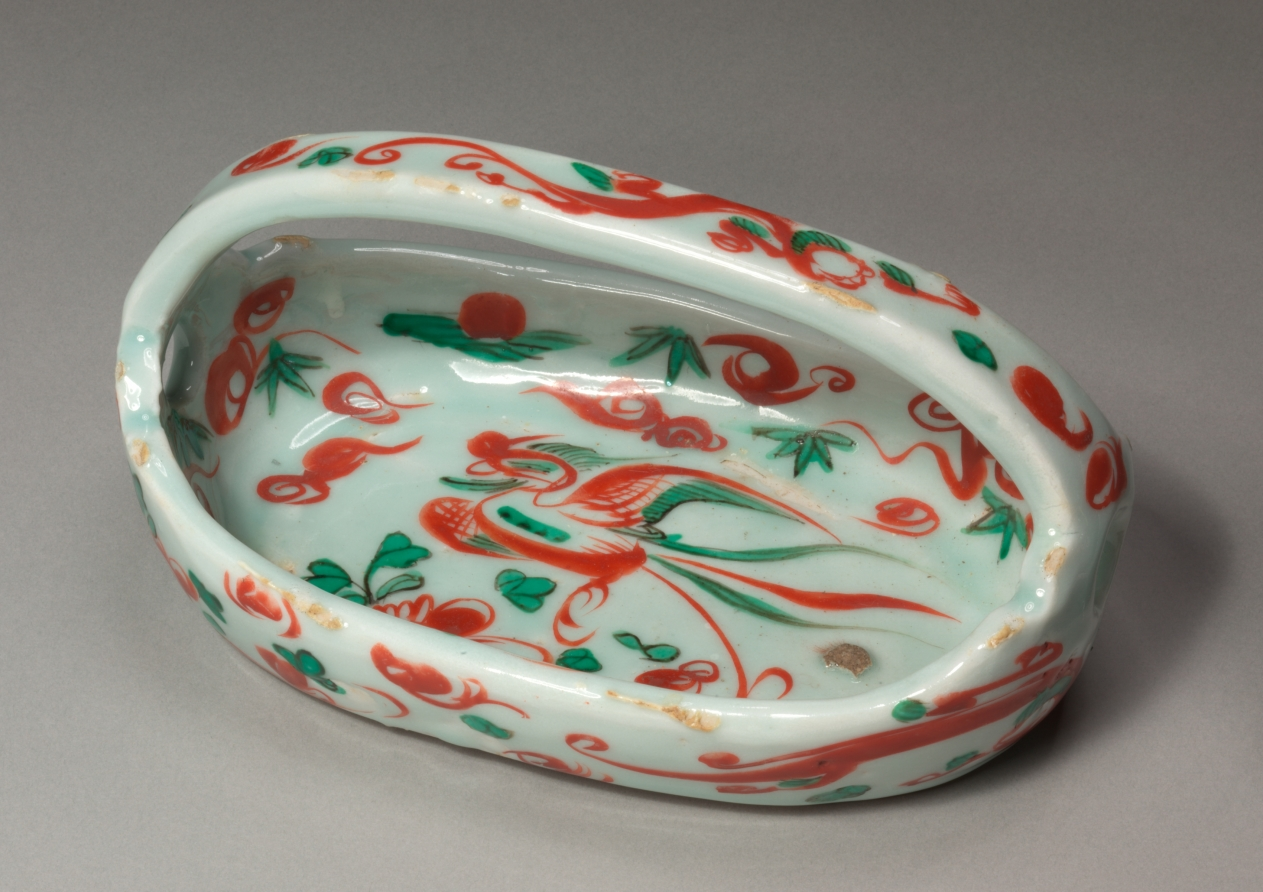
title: Basket Dish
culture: Japan, Edo period (1615–1868)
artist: style of Okuda Eisen (Japanese, 1753–1811)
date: late 1700s–early 1800s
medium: porcelain with overglaze color enamel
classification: Ceramic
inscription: signed "Eisen" in red enamel on base.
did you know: This dish was made for use in the kaiseki meal served in the tea ceremony.